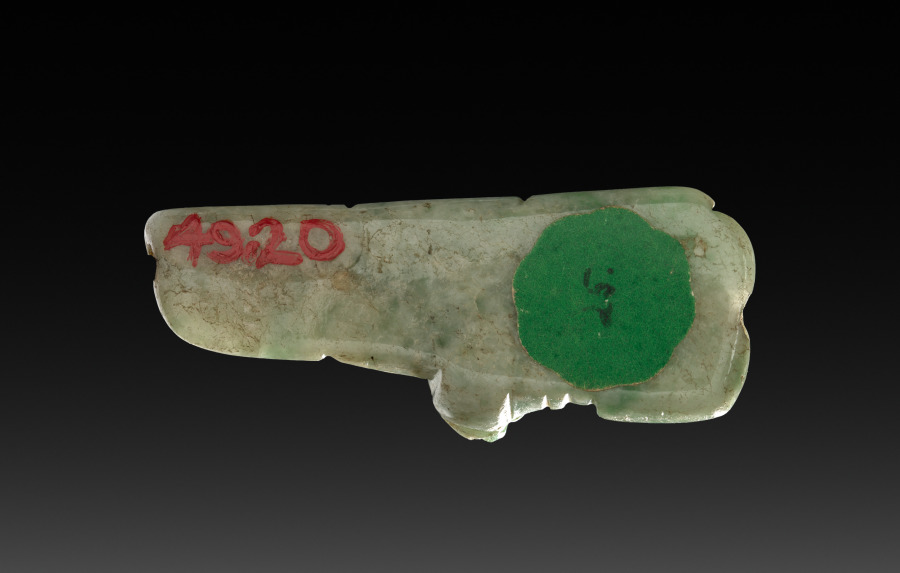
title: Pendant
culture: Maya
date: 250–900 CE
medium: jadeite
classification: Jade